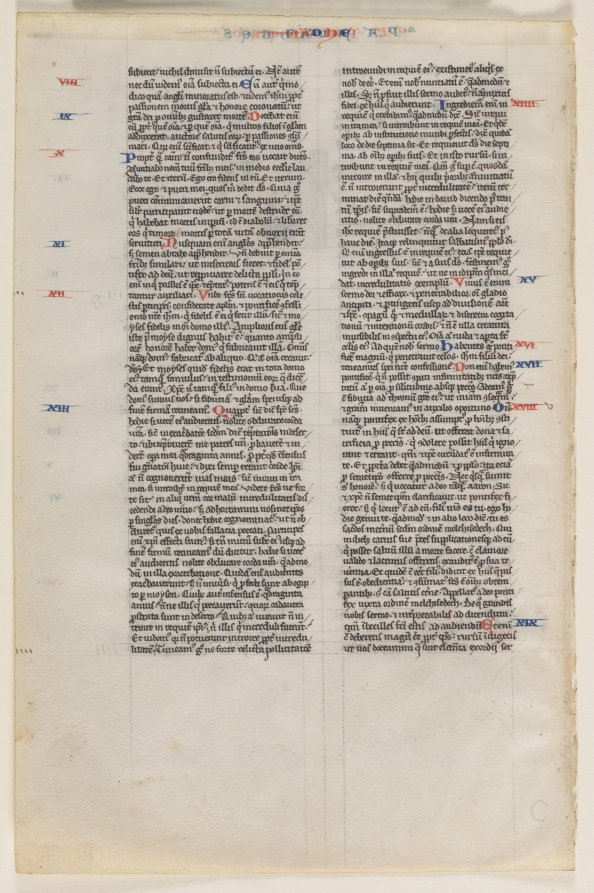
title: Leaf with Initial from a Latin Bible: Initial M: St. Paul with a Sword and a Book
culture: France, Paris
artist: Vienna Moralized Bible Workshop (French)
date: c. 1220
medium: ink, tempera and burnished gold on vellum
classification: Manuscript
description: Introducing Saint Paul's Epistle to the Hebrews, the text reads: Multifariam et multis modis olim Deus loquens patribus in prophetis (In many and various ways God spoke of old to our fathers by the prophets). The historiated initial M shows Saint Paul holding a sword, the instrument of his martyrdom, in his right hand. According to tradition, Paul was beheaded outside the gates of Rome. In his left hand he holds a book, indicating that he is the author of the Epistles of the New Testament. A Roman citizen and Christian missionary, Paul wrote his Epistle to the Hebrews to a community of Hebrew Christians. Of the many manuscript workshops active in Paris between about 1200 and 1250, only a handful have been identified by actual name. The figural style of the Vienna Moralized Bible Workshop is noted for its treatment of hair and eyes, the red dots of the cheeks, and the draperies with hairpin folds. The artist has drawn his inspiration from the animal-shaped initials of the previous century by converting the second arch of the M into a winged dragon.